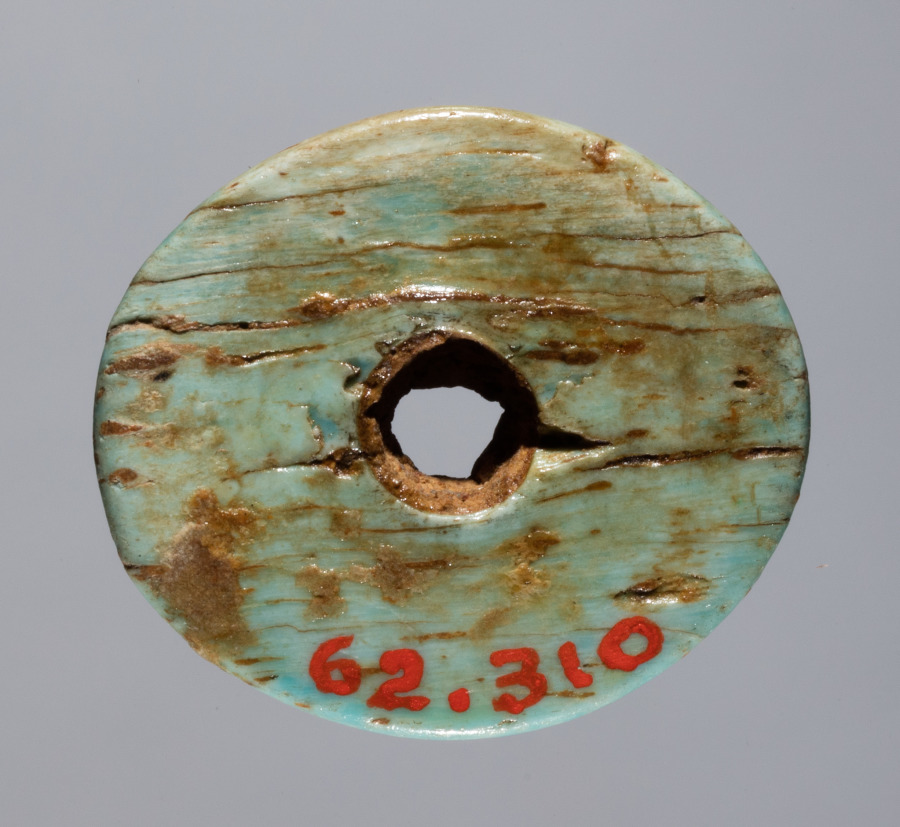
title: Spindle Whorl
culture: Iran, early Islamic period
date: 700s - 900s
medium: bone, incised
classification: Spindle Whorl